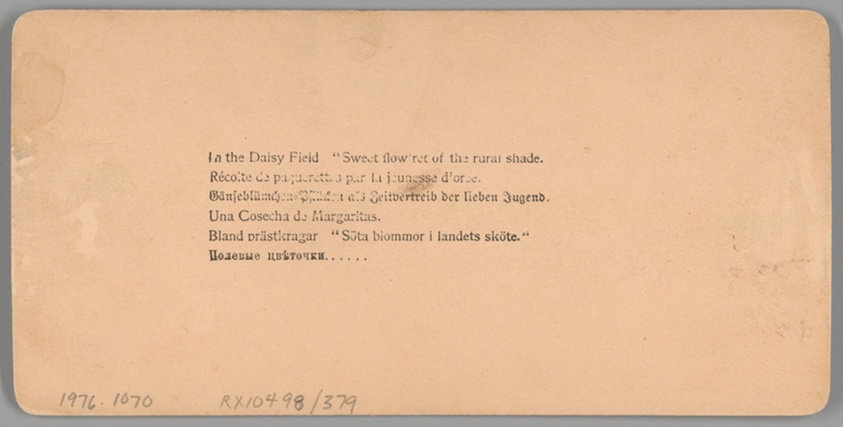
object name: Photograph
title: In the Daisy Field - "Sweet flow'ret of the rural glade"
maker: Underwood & Underwood (American, active 1881-1920)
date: 1897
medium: Albumen print, stereo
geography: New York City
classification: photography; photograph